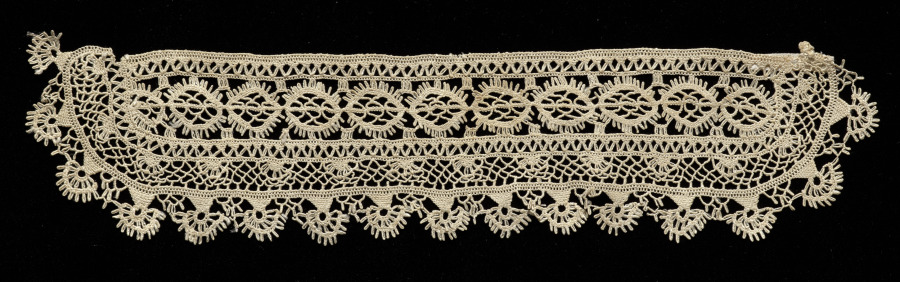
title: Lace Cuff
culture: Italy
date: 1600s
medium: Knotted lace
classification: Lace